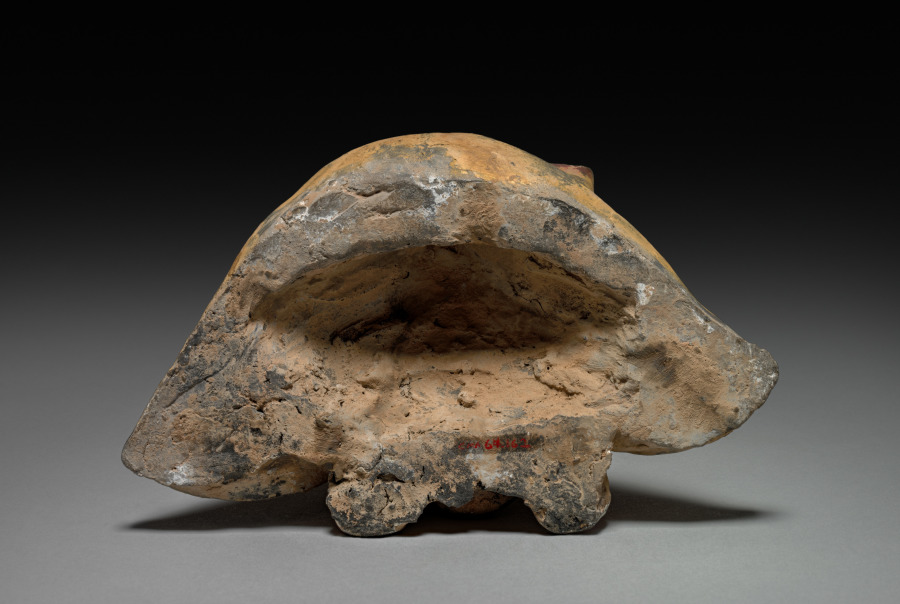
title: Kneeling Woman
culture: China, Western Han dynasty (206 BCE–8 CE) to Eastern Han dynasty (25–220 CE)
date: 100 BCE–100 CE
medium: painted earthenware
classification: Sculpture